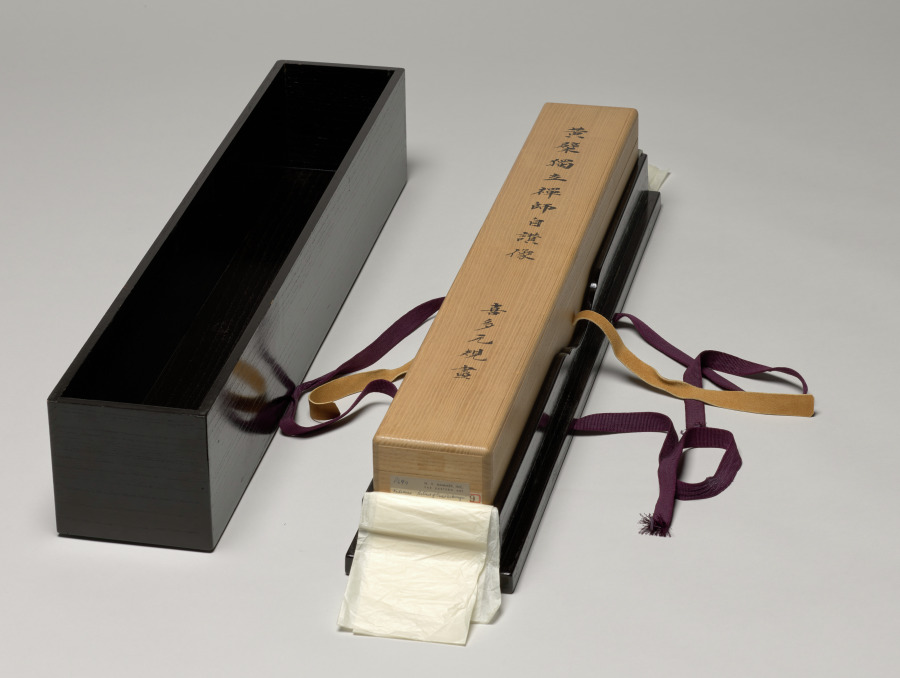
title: Portrait of Duli Xingyi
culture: Japan, Edo period (1615–1868)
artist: Kita Genki (Japanese, active c. 1664–98)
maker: Duli Xingyi (Chinese, 1596–1672)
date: 1671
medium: hanging scroll; ink and color on paper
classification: Painting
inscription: 1671 inscription at top of scroll by Duli Xingyi with three seals, 東矣䪩 (prefatory), 遺世獨立 (top) , 天外一閒人 (bottom); seal of Genki at lower left of painting 元規 .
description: In this portrait, the Ōbaku school Buddhist monk Duli Xingyi (born Tai Li, 1596–1672), whose name is pronounced Dokuryū Shōeki in Japanese, sits upon a woven mat holding a ceremonial scepter known as a ruyi, or nyoi in Japanese. Above his head is an insciption he added to the painting in 1671, the year before his death. It may be translated to read: Contemplative emptiness: the moon suspended over the village at midnight. Suddenly my soul is startled by the howl of an ape. Who could know that it would arouse me beyond my senses, and bring me an inner vision from Mt. Sumeru. (translated by Stephen Addiss and Kwan S. Wong) Originally from what is now the city of Hangzhou in China, Duli emigrated to Japan in 1653, where he took monastic vows. His skills in calligraphy and seal carving were formidable. Painter Kita Genki combined Chinese brush styles he learned in Nagasaki with Western painting techniques to capture Duli's likeness.